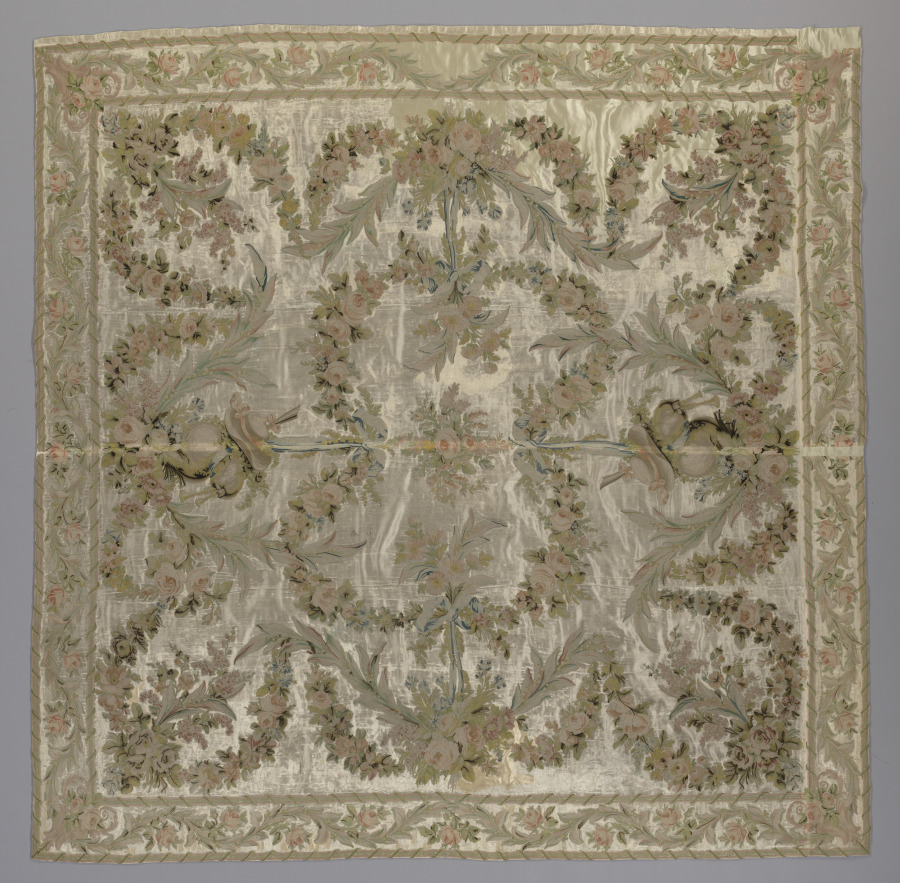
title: Coverlet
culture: France, 18th Century, period of Louis XVI (1774-1793)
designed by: Philippe de Lasalle (French, 1723–1805)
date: c. 1760–1770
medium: embroidered satin and silk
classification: Textile